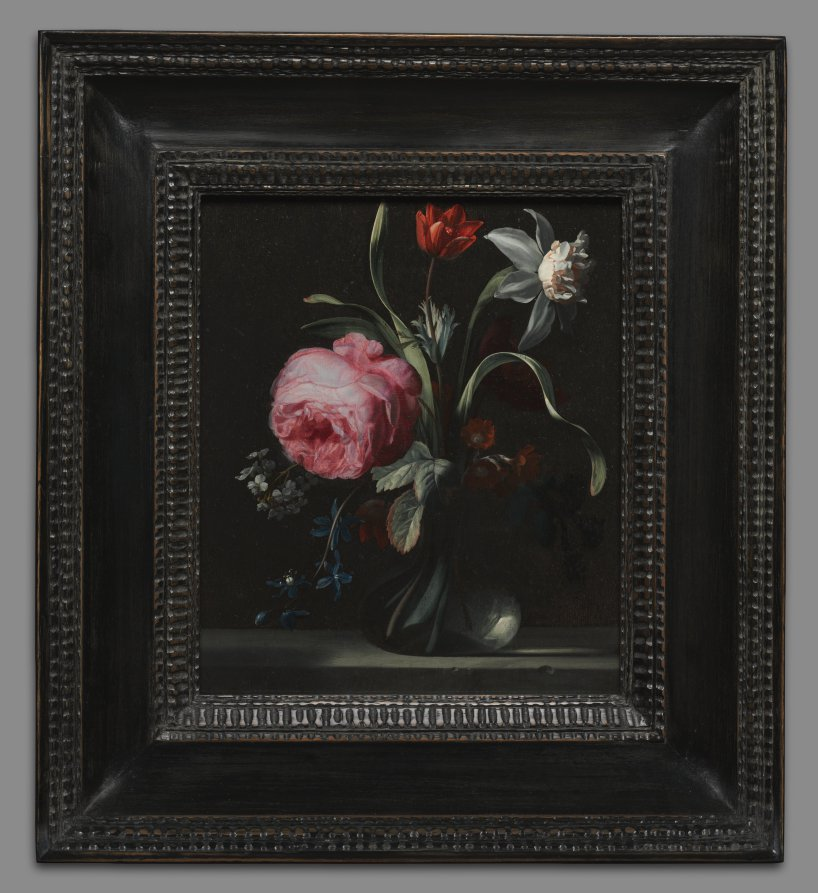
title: Flowers in a Vase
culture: Netherlands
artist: Simon Verelst (Dutch, 1644–1721)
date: c. 1669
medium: oil on wood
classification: Painting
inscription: signed S.V.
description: With just a few flowers, Verelst created a composition of great sophistication and balance. A simple glass flask is filled with a large rose, a red anemone, and a white narcissus tinged with pink. These flowers are surrounded by a scattering of smaller blossoms. Like many still-life painters, Verelst depicted a window reflected in the glass vase, but here he did not show the window's precise structure. He did, however, use another common device: the depiction of a few chips in the stone surface to make the material seem more tangible. Early in his career, Verelst moved from Holland to London, where he worked for the court of King James II and was extravagantly praised for the realism of his flower paintings.